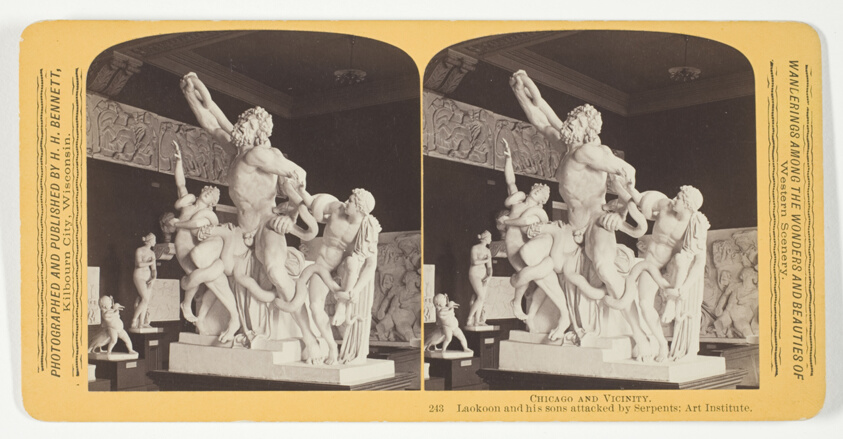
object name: Photograph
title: Laokoon and his sons attacked by Serpents; Art Institute, from the series "Chicago and Vicinity"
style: 19th century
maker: Henry Hamilton Bennett (American, born Canada, 1843-1908)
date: 1887/93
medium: Albumen print, stereo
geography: Chicago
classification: photography; photograph; albumen silver print; stereograph (albumen)